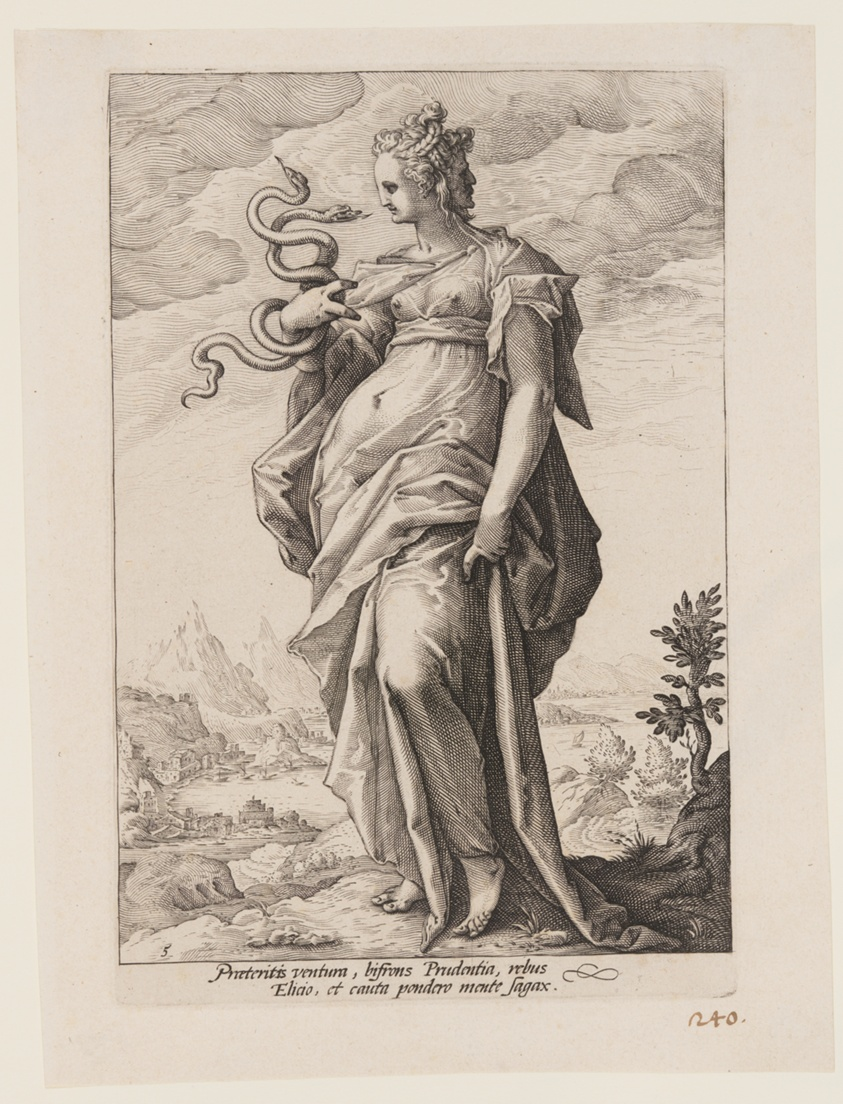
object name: Print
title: Prudence, from The Virtues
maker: Jacob Matham (Dutch, 1571–1631); after Hendrick Goltzius (Dutch, 1558–1617)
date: c. 1593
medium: Engraving on ivory laid paper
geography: Netherlands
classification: engraving; paper; print; prints and drawing